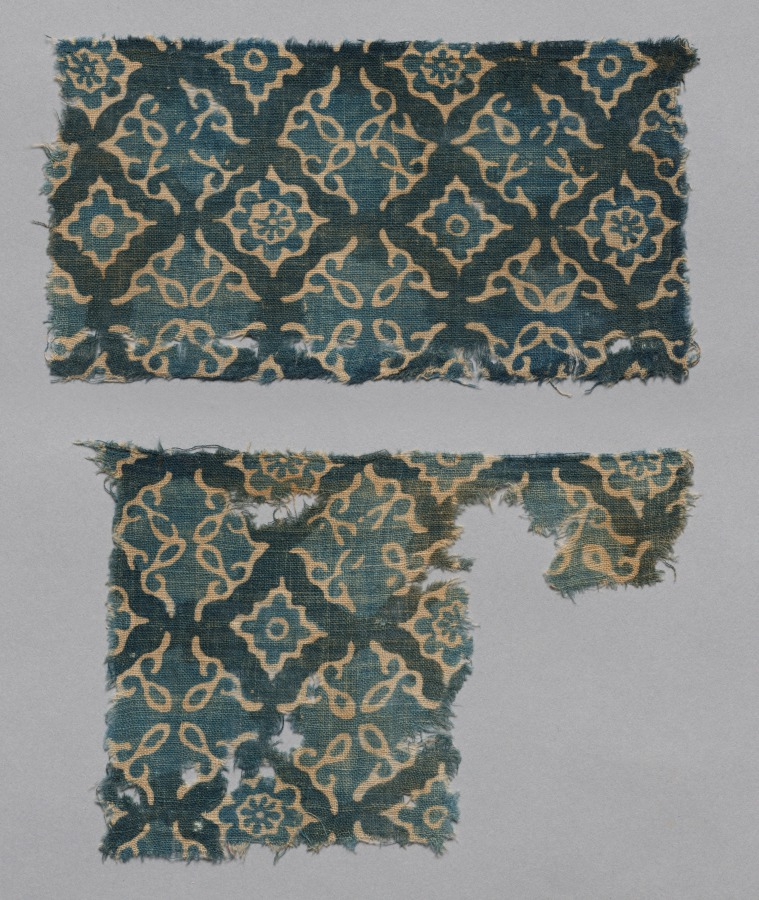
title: Fragments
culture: India, 12th-14th century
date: 1100s - 1300s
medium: plain cloth, resist dyed; cotton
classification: Textile